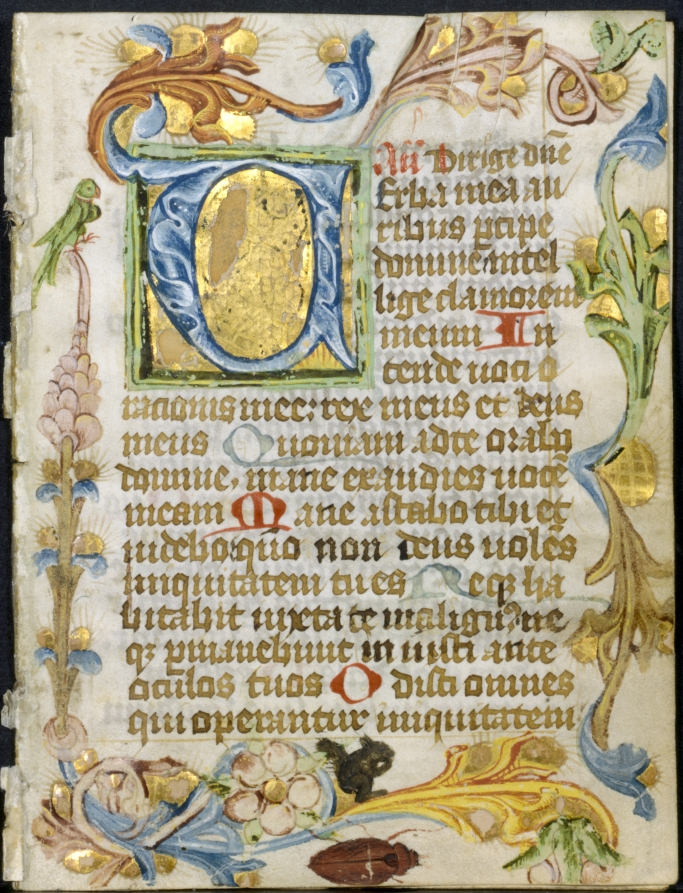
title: Bifolio from a Book of Hours: Initial V with Floral Border (recto); Text (verso)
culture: Austria (? ) or Bohemia (?), 15th century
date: c. 1460–1500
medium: ink, tempera and gold on vellum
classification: Manuscript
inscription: Dirige, D[omi]ne [Deus meus, in conspectu tuo viam meam]…Psalm 5: Verba mea auribus percipe Domine intellege clamorem meum, Intende voci orationis meae rex meus et Deus meus, Quoniam ad te orabo Domine mane exaudies vocem meam, Mane adstabo tibi et videbo quoniam non deus volens iniquitatem tu es, Neque habitabit iuxta te malignus neque permanebunt iniusti ante oculos tuos, Odisti omnes qui operantur iniquitatem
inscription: ... Decidant a cogitationibus suis, secundum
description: The word dirge, today meaning a mournful hymn for funerals, comes from the opening Latin in the Office of the Dead, seen just after the decorative letter A at upper left. During the Middle Ages, dirge became the shortened way to refer to the Office of the Dead. Although primarily recited at funerals, the office was also prayed at home as a reminder of mortality and a protection against sudden death. Surrounding the text, which contains Psalm 5, is a border decoration of acanthus leaves, believed to grow in paradise, as well as a parrot, a squirrel, a beetle, and flowers.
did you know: The Office of the Dead, usually at the end of books of hours, contains the same set of prayers the ordained used during funeral rites.